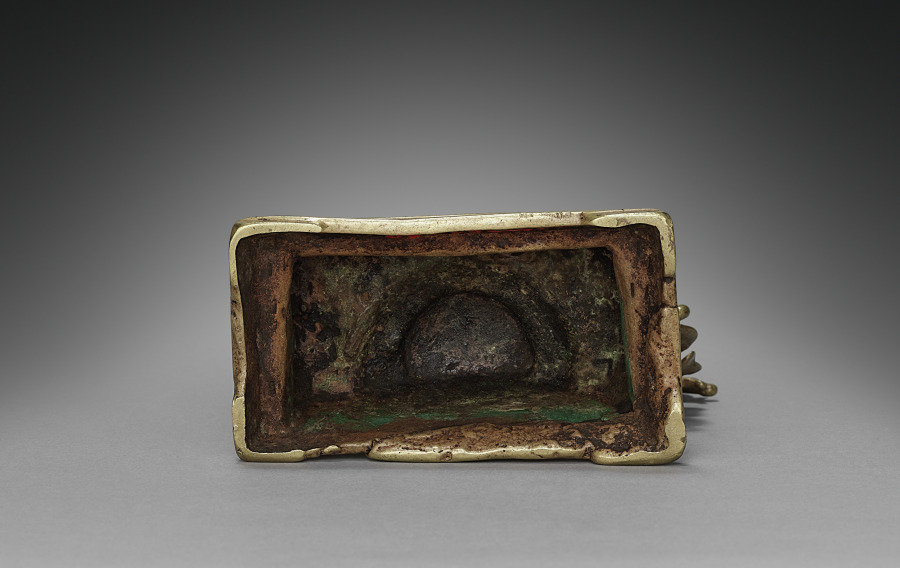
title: Standing Vishnu with Attendants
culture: India, Kashmir, 9th century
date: 800s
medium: brass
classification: Sculpture